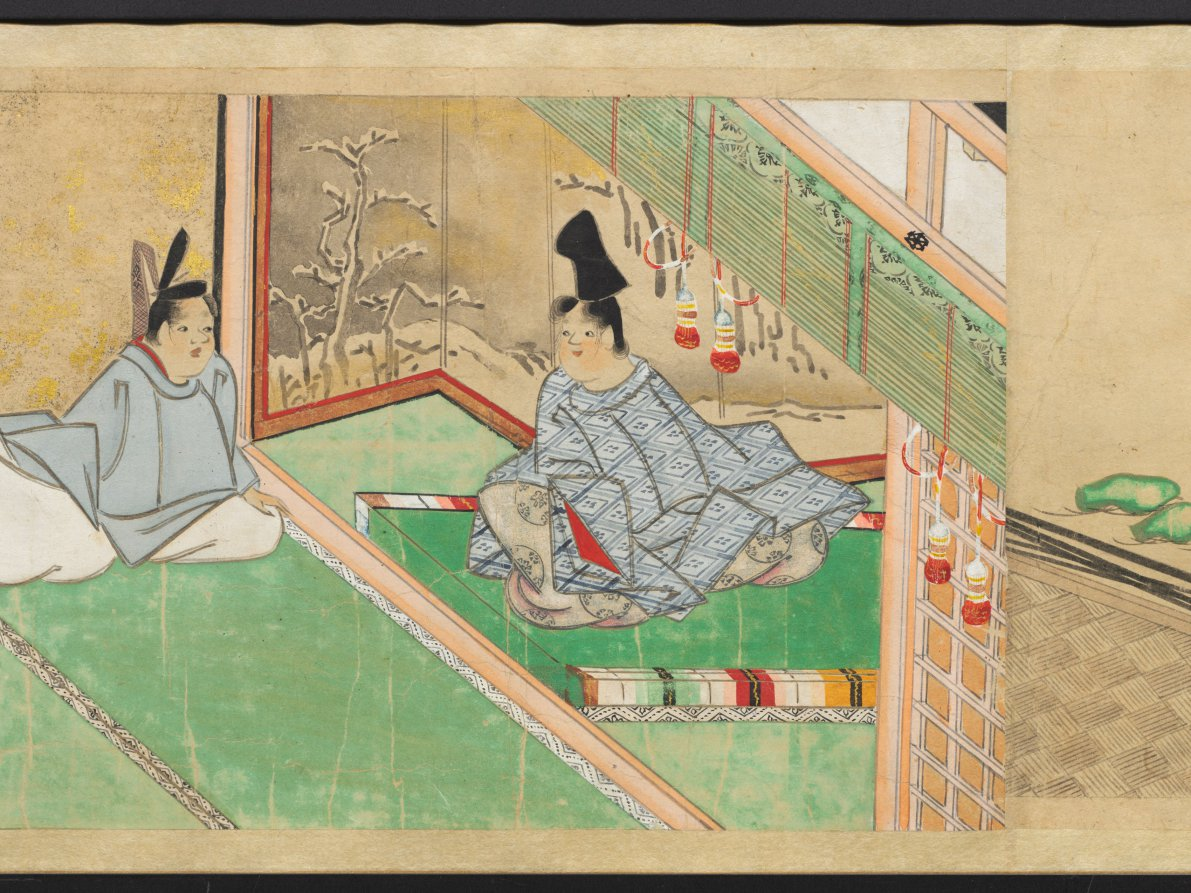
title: The Saltmaker's Story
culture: Japan, Edo period (1615–1868)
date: early 1600s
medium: One of a pair of handscrolls; ink, color, and gold on paper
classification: Painting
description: Once read and copied by girls at New Year’s celebrations and included in dowries, The Saltmaker’s Story is a rags-to-riches tale in which daughters are gifts from the gods. Despite his simple outlook, the main character progresses from humble roots as an associate at Kashima Shrine to the elite status of grandfather of the emperor through the intervention of the Kashima deity. The Saltmaker’s Story is traditionally presented in a set of three scrolls, but the text of this set has been removed by a previous owner, who remounted the illustrations as a pair. The paintings of this one take us from right to left through the first half of the tale.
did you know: This handscroll originally had texts before its paintings, but the texts were removed.